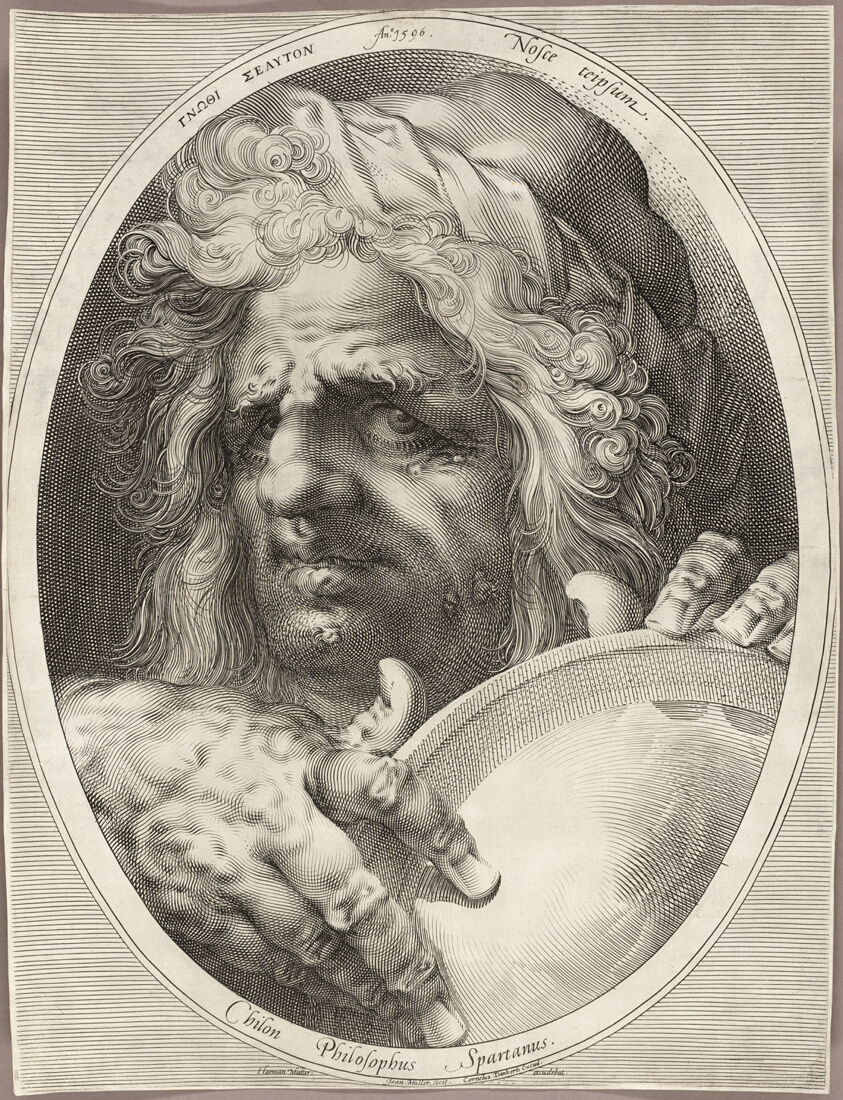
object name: Print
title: Chilon of Sparta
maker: Jan Harmensz Muller (Dutch, 1571-1628); published by Harmen Jansz. Muller (Dutch, c. 1540-1617)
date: 1596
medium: Engraving in black on ivory laid paper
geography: Netherlands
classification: engraving; print; prints and drawing